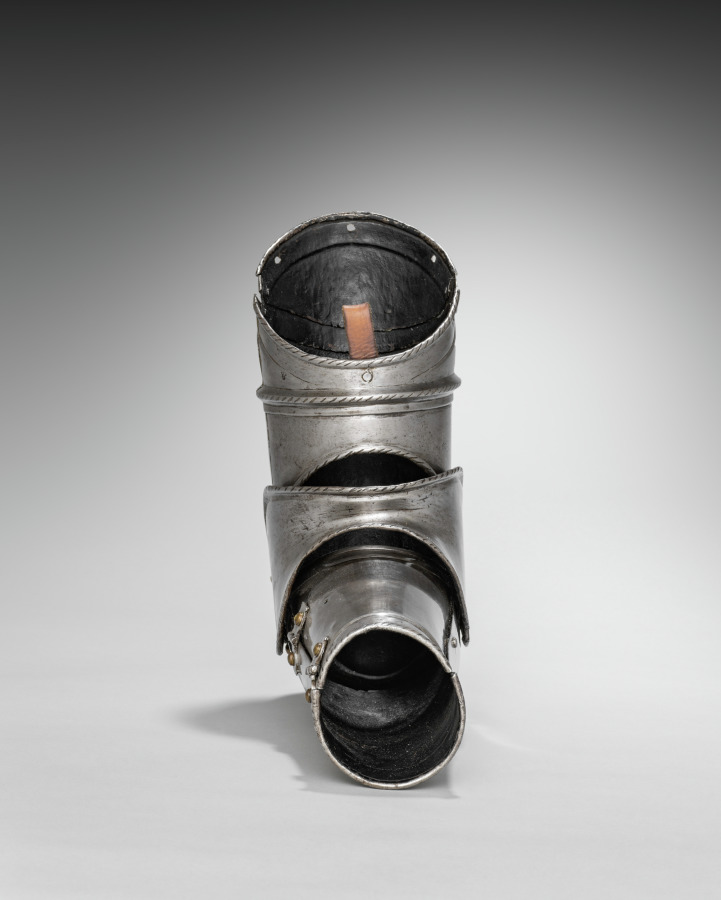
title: Proper Left Arm (Vambrace, Rerebrace and Couter)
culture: South Germany, 16th century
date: c. 1560–1580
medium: steel, leather straps, brass rivets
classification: Arms and Armor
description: This armor was developed for the joust-a sporting combat between two mounted contestants. Although all of the elements of this armor date from the same period, they are not all from the same suit. This armor is thus called "composed." It also shows the asymmetry of jousting armor. The participants rode along a wall-like barrier known as a "tilt" with their left sides facing one another. Consequently, armor on that side of the body had to be thicker. Note the large plate (grandguard) over the left shoulder for extra protection. Also, the breathing holes in the helmet were placed on the right side (farthest from an opponent's lance) to avoid injuries from splinters. The bracket attached to the right breastplate is called the lance-rest, a shock-absorbing support designed to accommodate the lance when "couched" under the right armpit.